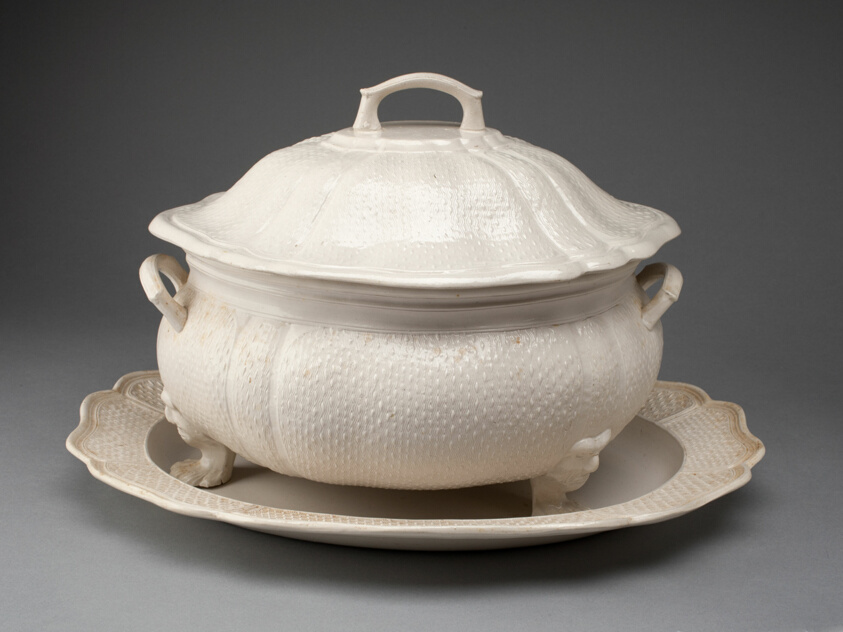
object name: Ceramics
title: Tureen and Stand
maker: Staffordshire, England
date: 1760/69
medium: Salt-glazed stoneware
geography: Staffordshire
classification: stoneware; ceramics; european decorative arts; salt-glazed stoneware